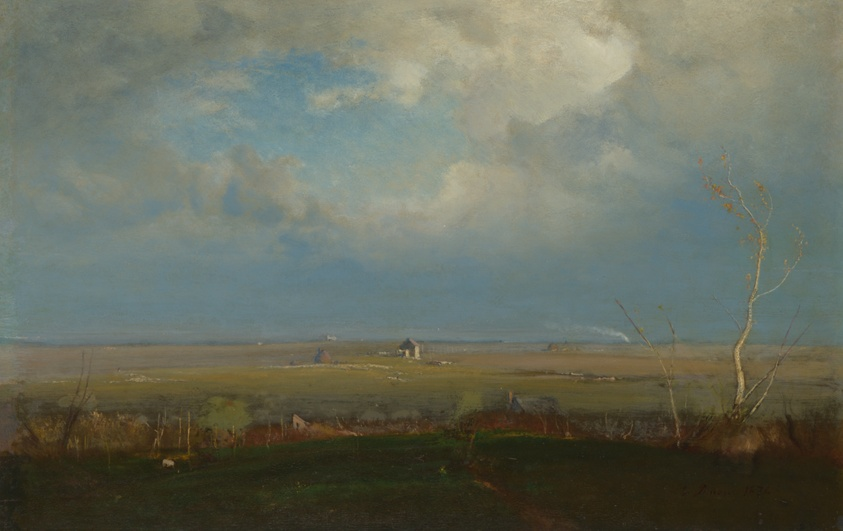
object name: Painting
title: Twilight in Italy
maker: George Inness (American, 1825–1894)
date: 1874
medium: Oil on panel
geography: United States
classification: painting; american arts